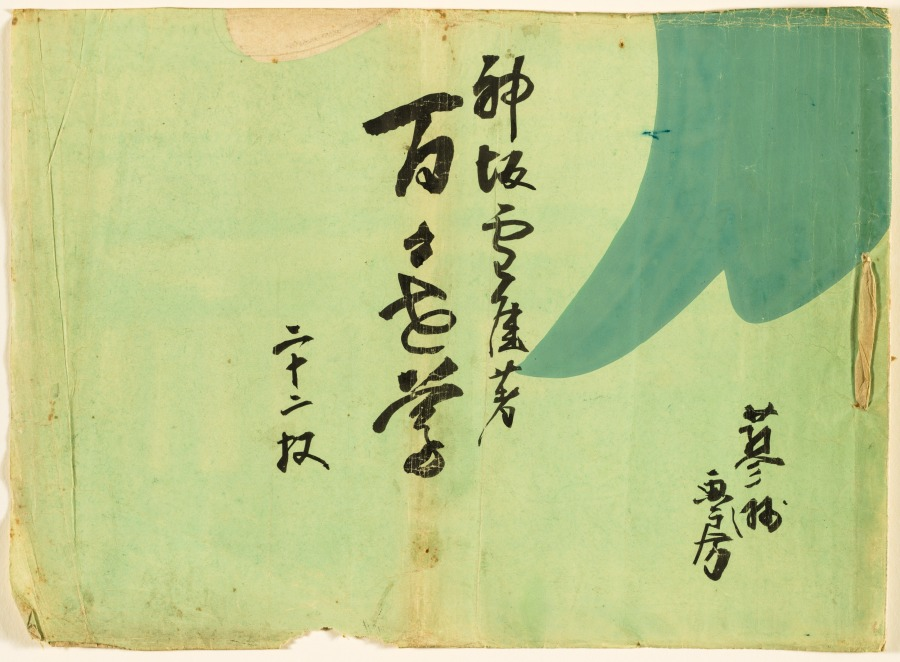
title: Flowers of a Hundred Worlds (Momoyogusa)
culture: Japan, Meiji period (1868–1912)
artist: Kamisaka Sekka (Japanese, 1866–1942)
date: 1909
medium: ink and color on paper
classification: Drawing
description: This is the cover for a group of 22 preparatory drawings for Kamisaka Sekka's print series Flowers of a Hundred Worlds.